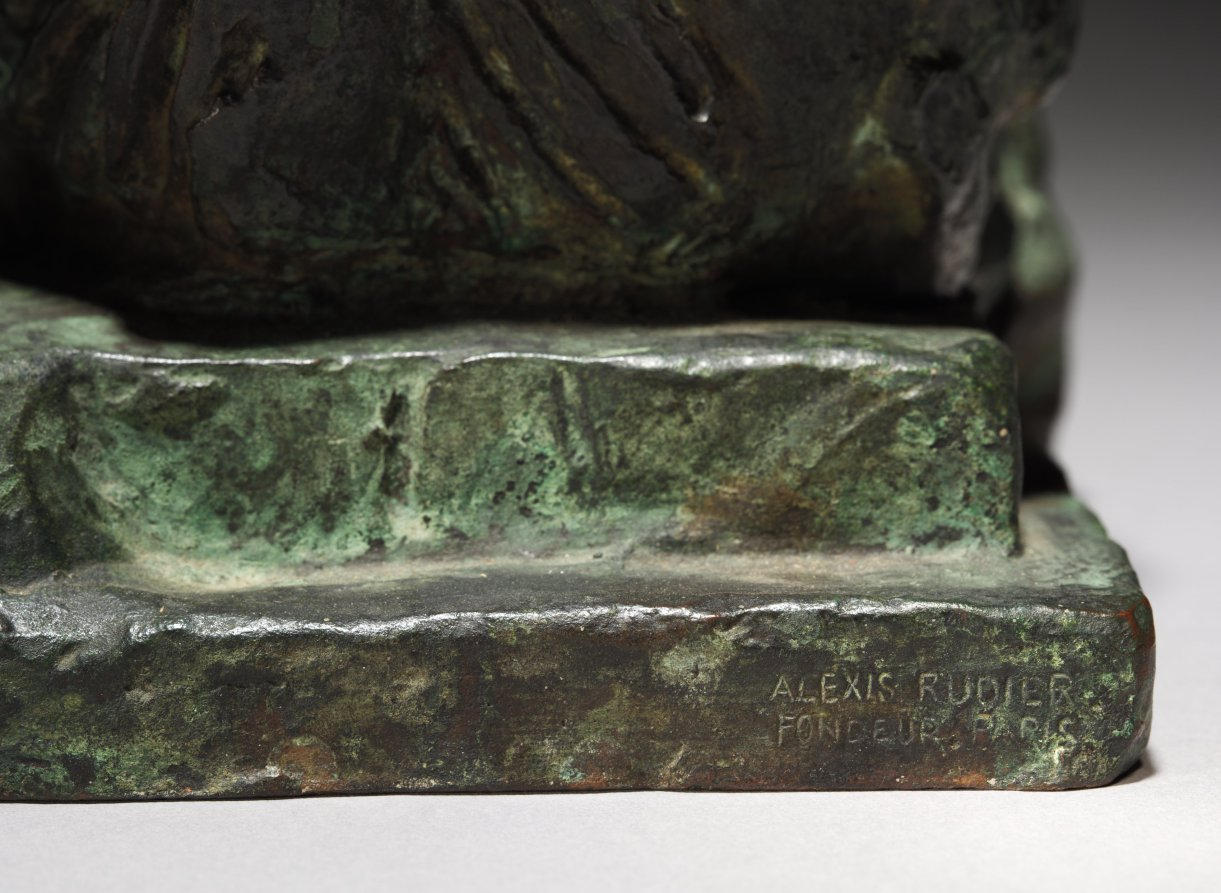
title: Sappho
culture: France, 19th century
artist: Emile Antoine Bourdelle (French, 1861–1929)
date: 1887–1925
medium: bronze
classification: Sculpture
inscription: Inscribed on back: "Alexis Rudier, Fondeur, Paris"; on right side: "E. A. Bourdelle"